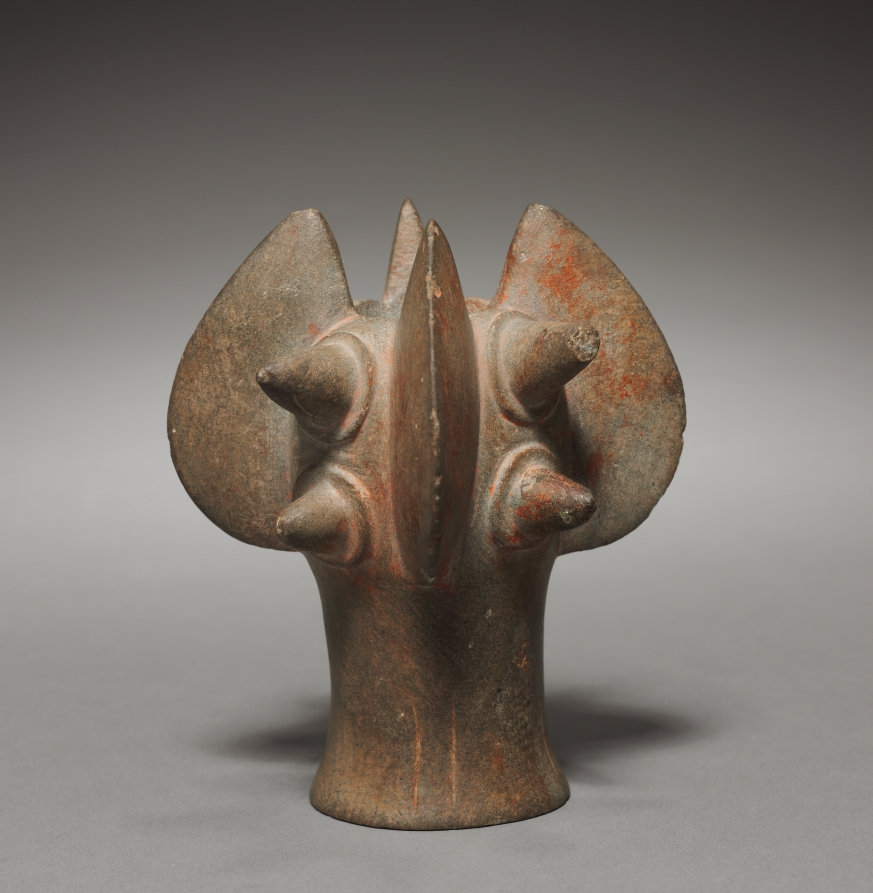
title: Mace Head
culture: North coast of Peru, Salinar culture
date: c. 200 BCE–100 CE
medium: stone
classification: Stone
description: This handsome object was slipped onto a wooden shaft to form a mace, a club-like weapon used in war. It is unclear, however, whether the ancients used examples as well carved as this one in anything but ceremonial circumstances.